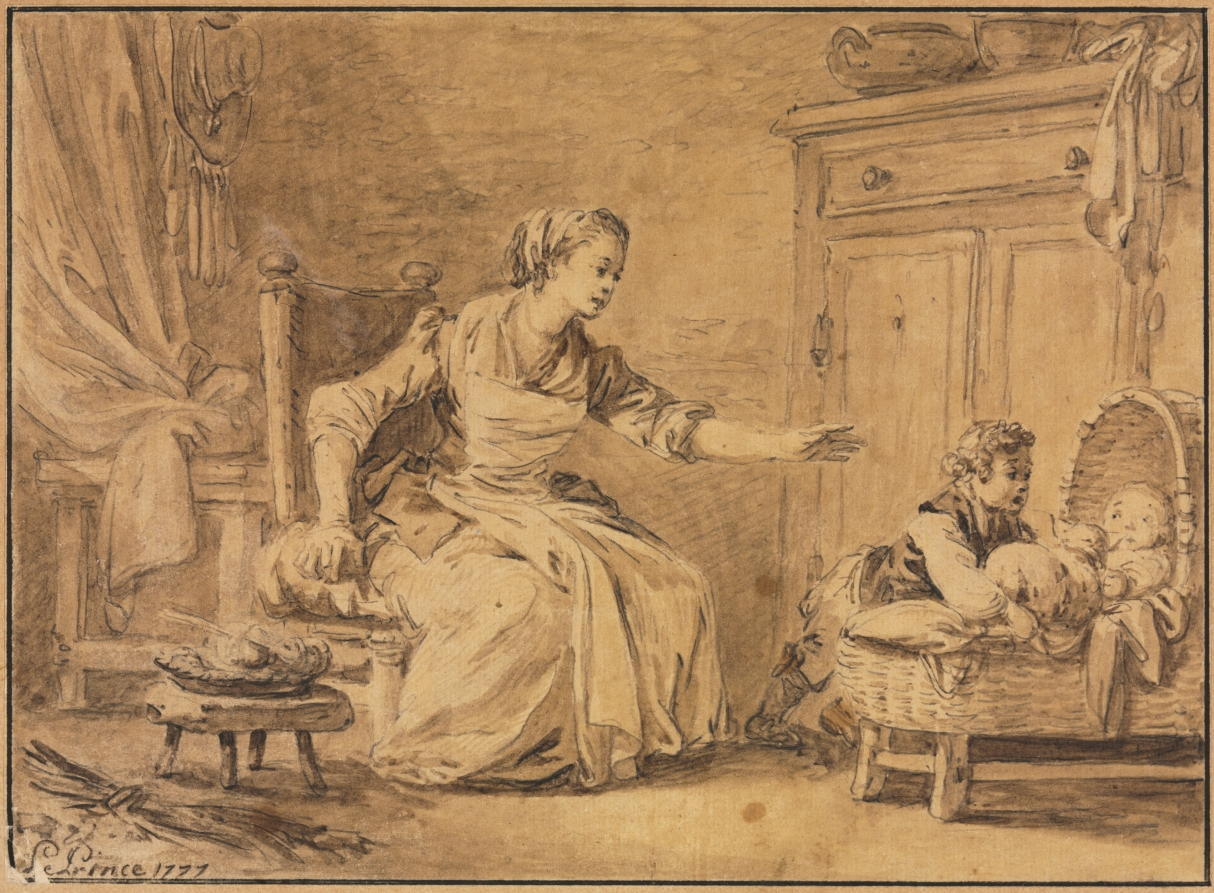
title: Maternal Solicitude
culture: France, 18th century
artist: Jean Baptiste Le Prince (French, 1734–1781)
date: 1777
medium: pen and black ink and brush and brown wash over graphite, with traces of white gouache; framing lines in black ink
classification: Drawing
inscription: signed, lower left, in black ink: Le Prince 1777